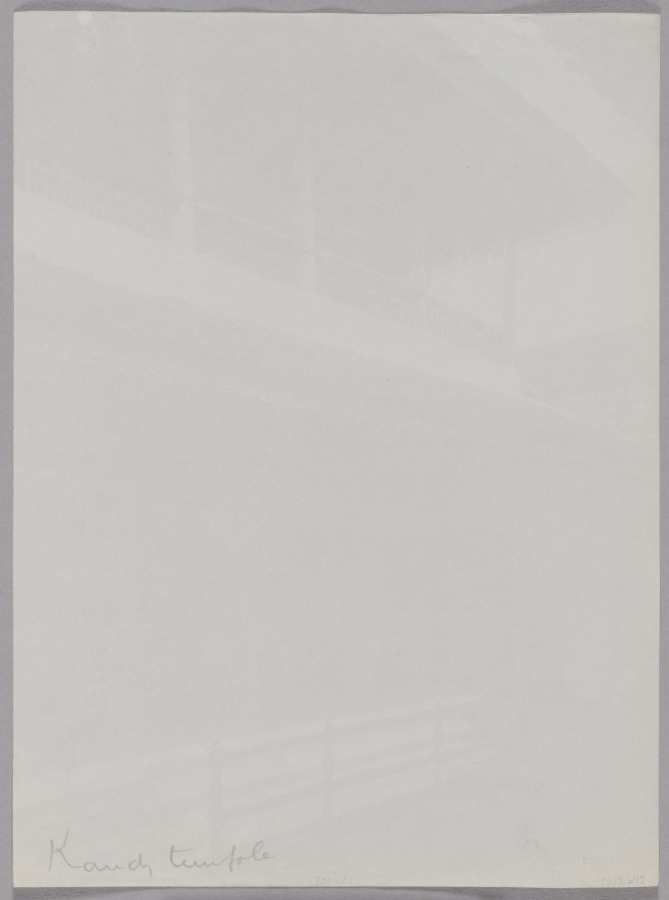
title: Buddhist Temple in Kandy, Ceylon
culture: England, 19th century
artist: Skeen & Co. (British, active 1860–1920)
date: c. 1880s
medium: albumen print from wet collodion negative, hand colored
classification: Photograph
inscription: On recto: "Skeen & Co 878" On verso, in graphite: "Kandy temple" 8078/1